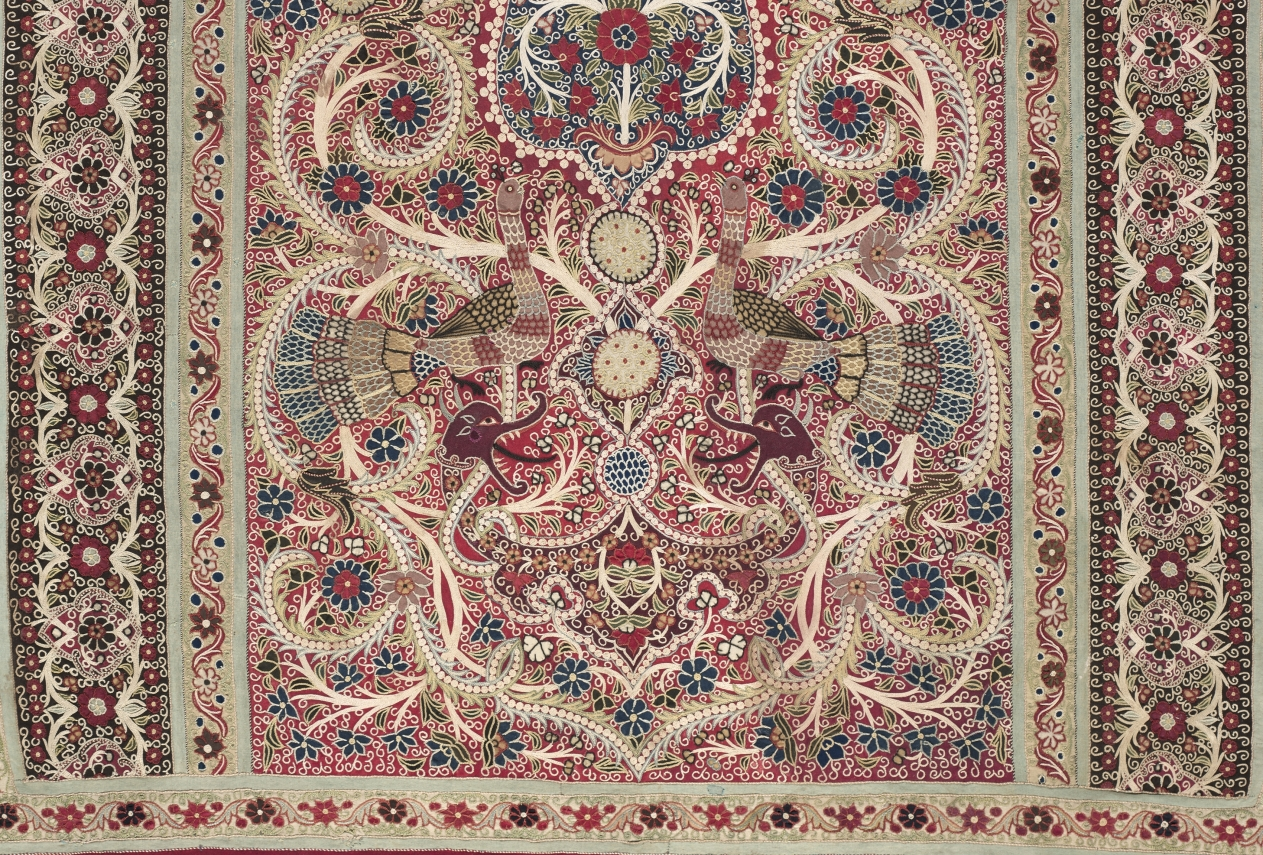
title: Tent Wall Panel(?)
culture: Iran, Rasht, Qajar period (1779-1925)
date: 1800s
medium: Wool: inlaid work; silk: embroidery, chain stitch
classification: Embroidery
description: Elaborate arched panels with multiple borders similar to this textile formed the mosaic-like interior walls of imperial tents. Here, the field is dominated by a richly decorated cypress tree above peacocks and dragon heads on an ornate foliate ground. We look upon the gardenscape through a niche (mihrab) formed by this foliage. Bright white silk “pearl” outlines, vines, and ringlets in chain-stitch embroidery enliven the pattern on contrasting colors of fulled wool. Internationally fashionable botehs, or paisleys, decorate the outer red borders.This technique has been referred to by many different names including: Rasht work, Resht work, Rashti-duzi, Rachti-douzi, embroidery applique, mosaic embroidery, piecework, patchwork, embroidery brocade, and inlaid patchwork. Many of these terms are to various degrees inaccurate descriptions of this technique. Perhaps the most practical term is Rasht work, named for the town in Iran where the technique was popularized. It begins as a ground of felted plain weave wool. Desired shapes are then punched out of the ground with a metal die and hammer. The same is done with wool of an alternating color. The edges of the different cut pieces are then embroidered together into various designs using a silk chain stitch (golab-duzi). Although this piecework technique was recorded in Iran in the 1670s, most examples survive from the 19th century, when foreigners praised them as “really [the] most beautiful embroidery.” The technique appears in furnishing fabrics, and horse covers, as well as imperial portraits, including one depicting the Qajar monarch Fath ‘Ali Shah, who ruled in 1797–1837. Sometime after leaving the workshop this panel experienced moth damage; small patches can be seen throughout.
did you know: Generally, Rasht work was made by men. Boys handled the delicate embroidering while older men designed cartoons and punched the wool designs.